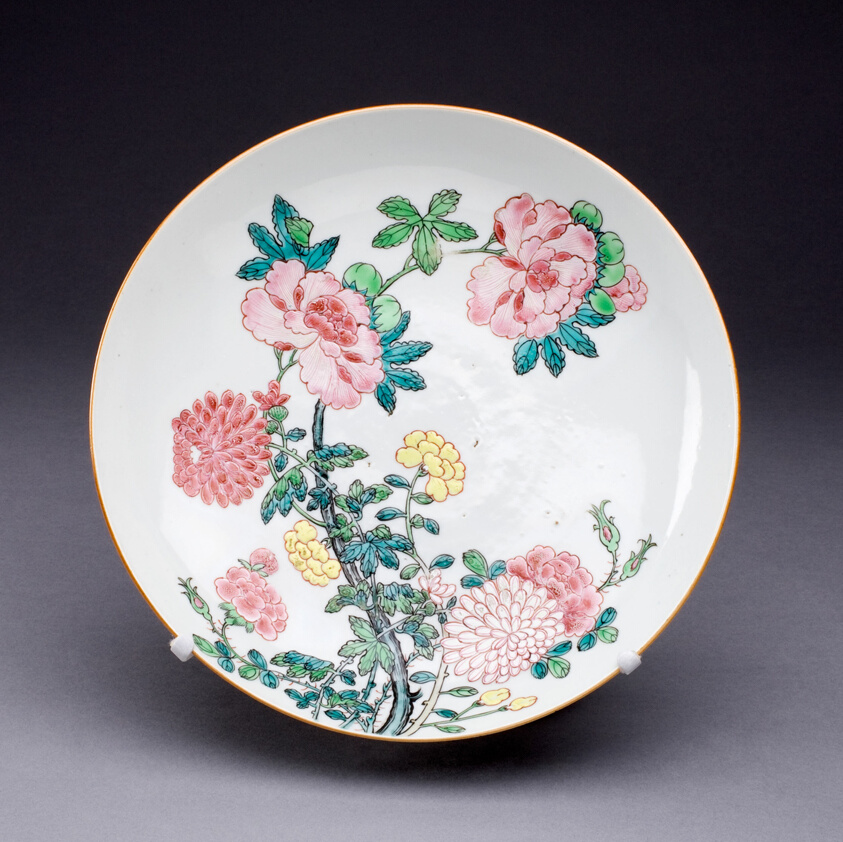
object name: Ceramics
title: Dish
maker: China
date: c. 1725, Qing Dynasty (1644–1911), Yongzhen period (1723–1735)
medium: Hard-paste porcelain and polychrome enamels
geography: China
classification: dish (vessel); ceramics